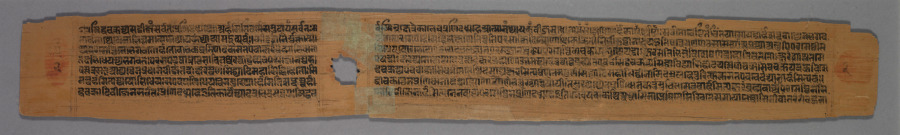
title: Folio 2 (verso), from a Great Poem about Twos (Dvyashraya Mahakavya) of Hemachandra with Commentary by Abhayatilaka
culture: Western India, Gujarat, possibly Patan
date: 1428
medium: Gum tempera and ink on palm leaf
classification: Painting